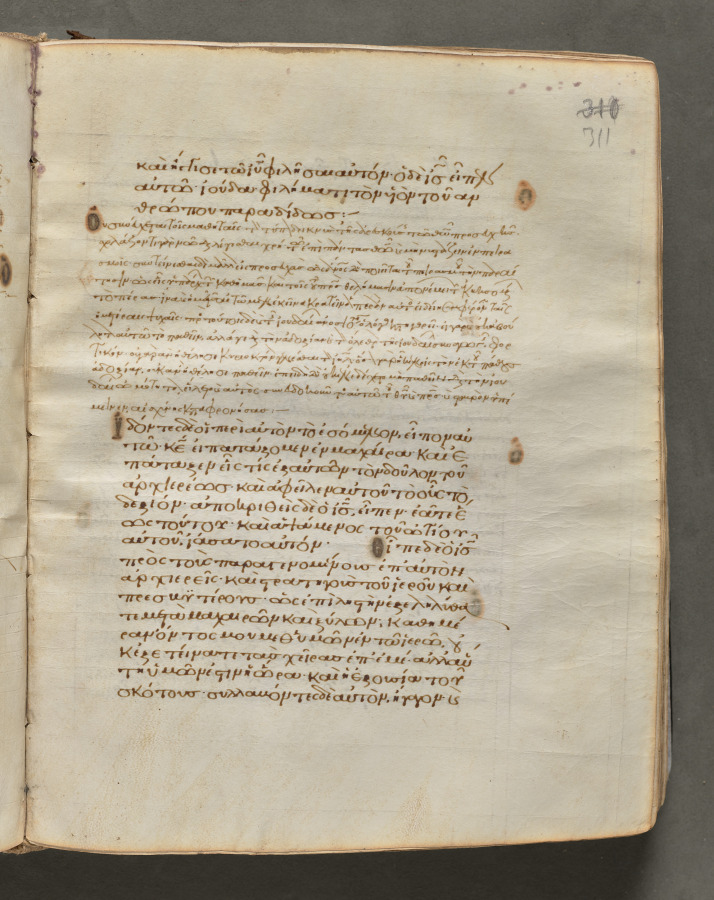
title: Text, folio 311 (recto), from a Gospel Book with Commentaries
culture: Byzantium, Constantinople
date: c. 1000–1100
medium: ink, tempera, and gold on vellum; leather binding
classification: Bound Volume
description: Each of the four gospels in this book opens on a page with brilliantly illuminated borders depicting the author of the text as well as birds—principally peacocks, symbols of the immortality of the soul—and fountains, representing the fountain of life and the salvation of the soul. This volume consists of 428 leaves with texts in Greek. Its level of sophistication suggests that it was probably written and decorated in a monastery in Constantinople.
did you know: Gospel books were carried in procession through Byzantine churches.